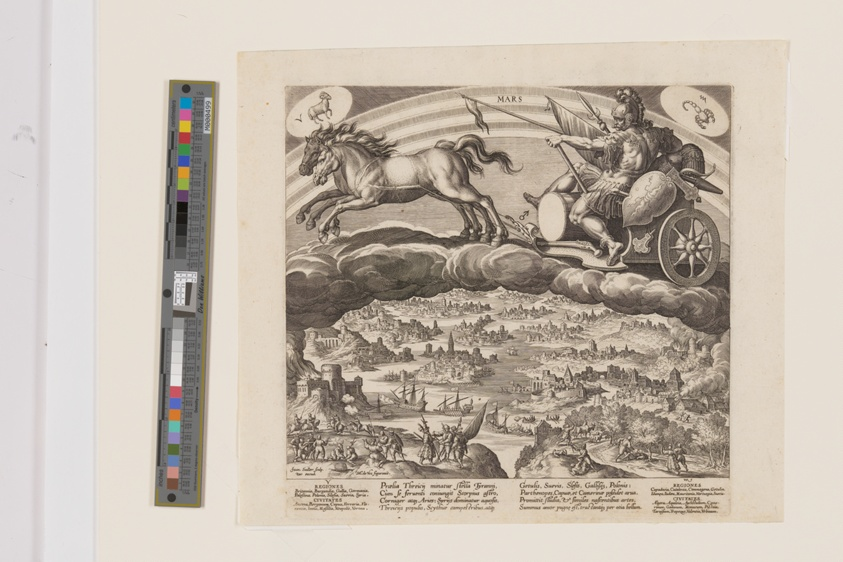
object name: Print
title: Mars, from The Seven Planets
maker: Jan Sadeler I (Flemish, 1550–1600); after Maarten de Vos (Flemish, 1532–1603)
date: 1585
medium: Engraving on ivory laid paper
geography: Flanders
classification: engraving; paper; print; prints and drawing